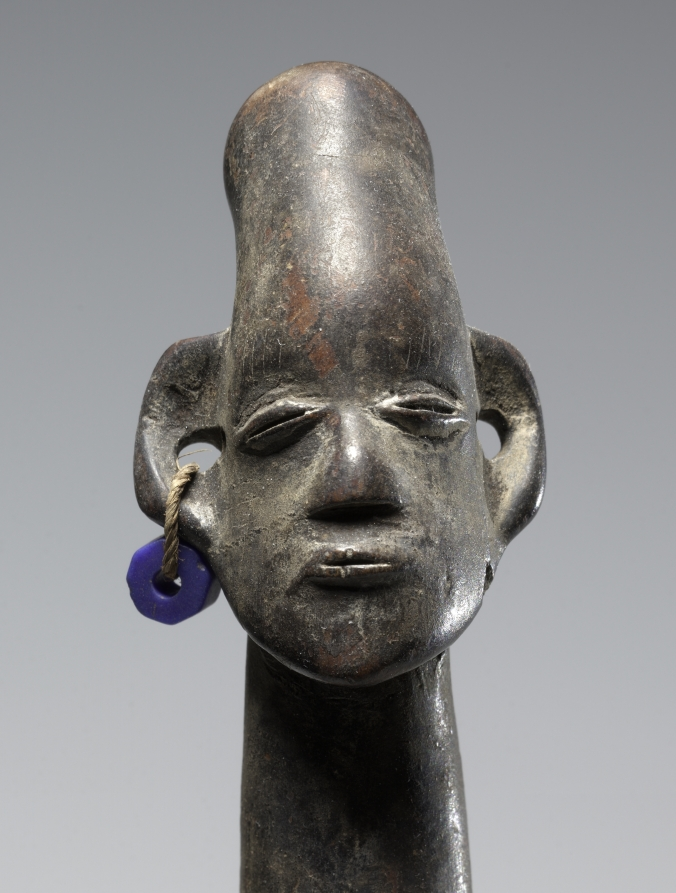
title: Bowharp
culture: Africa, Central Africa, Democratic Republic of the Congo, Mangbetu-style maker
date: by 1928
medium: Wood, rawhide, plant fiber, metal, and glass bead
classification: Musical Instrument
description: Although five-stringed melodic harps with anthropomorphic decorations are found among different peoples in northern Congo, the elongated skull of this work is characteristic of the Mangbetu. Such instruments commonly served to accompany songs by either male or female musicians. Cleveland artist Paul Travis acquired this work and some others during his travels in Central Africa in 1928.